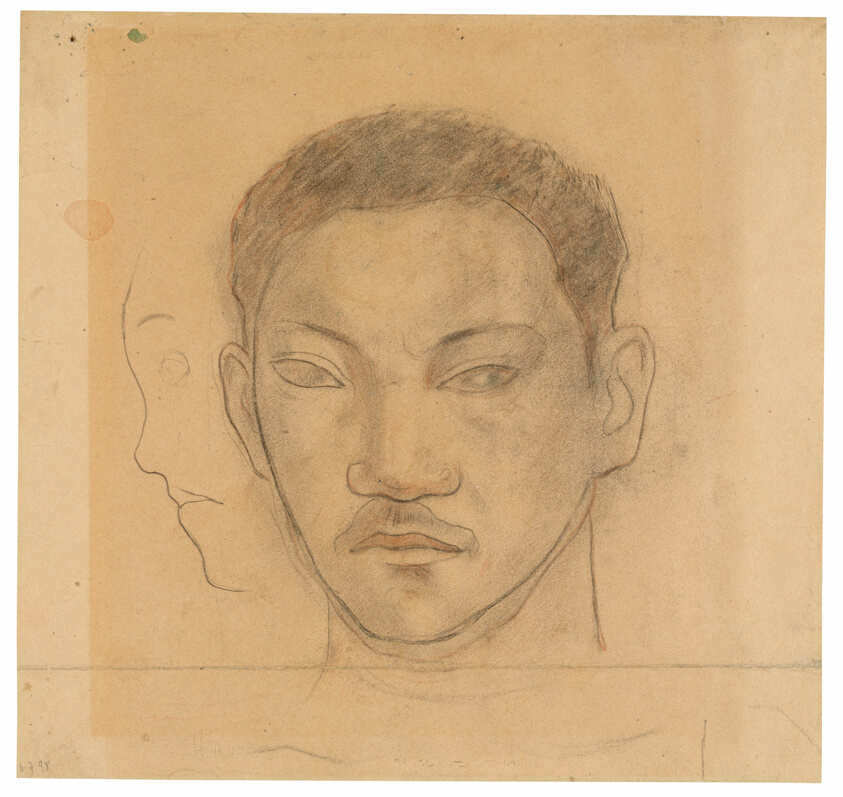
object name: Drawing and Watercolor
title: Head of a Tahitian with Profile of Second Head to His Right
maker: Paul Gauguin (French, 1848-1903)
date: 1891/93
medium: Black and red chalk, selectively stumped, on cream wove paper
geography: France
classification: chalk; drawings (visual works); prints and drawing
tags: Century of Progress, world's fairs, Chicago World's Fairs